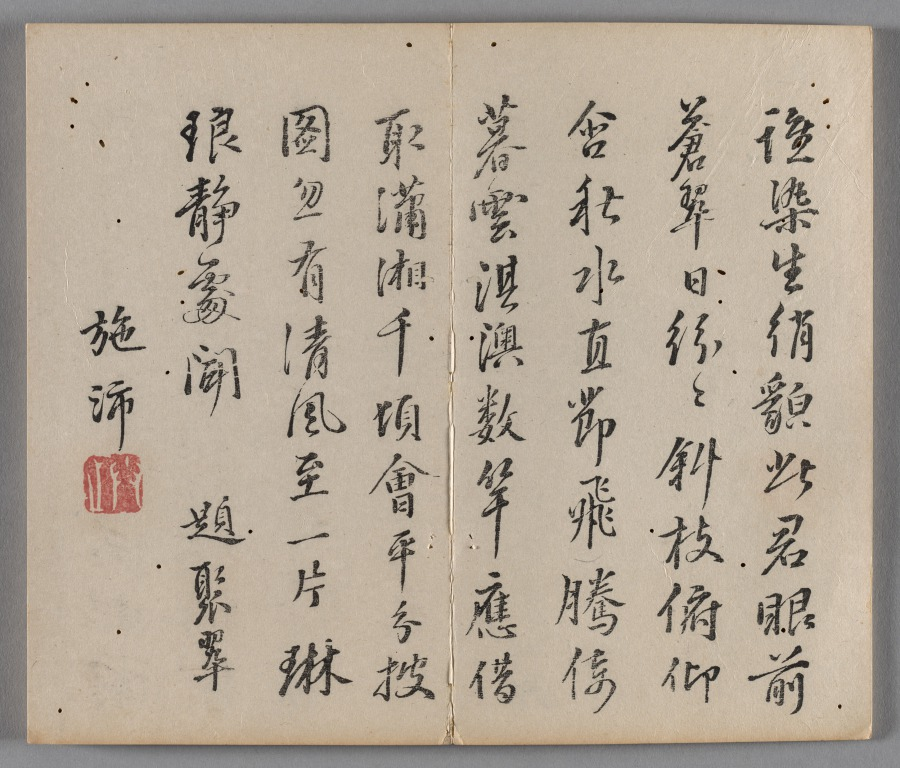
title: Ten Bamboo Studio Painting and Calligraphy Handbook (Shizhuzhai shuhua pu): Bamboo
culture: China, Qing dynasty (1644-1911)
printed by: Hu Zhengyan (Chinese, c. 1584–1674)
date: 1633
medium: Woodblock-printed book; ink and colors on paper; first edition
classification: Print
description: Color printing reached a level of perfection in the early 1600s, as seen in this Ten Bamboo Studio Collection of Calligraphy and Painting and the Mustard Seed Garden Manual of Painting (printed 1679 and 1701). The painterly quality, precision in registering (aligning) the woodblocks, and harmonious colors made them the most successful color print editions in Chinese history. Both editions were printed and compiled in Nanjing, spread nationwide, and had a great impact on the arts in Japan and Korea.